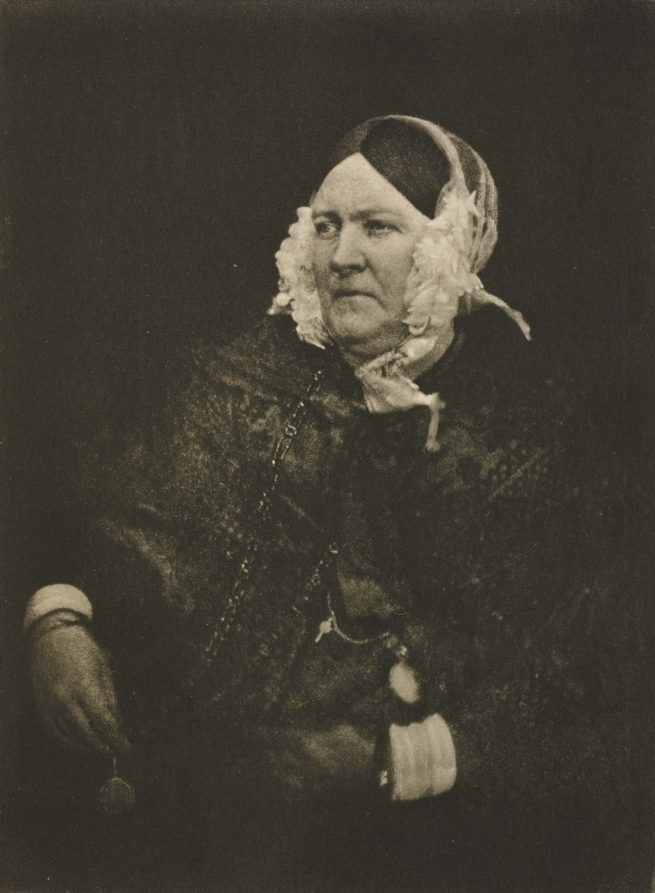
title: Camera Work: Mrs. Rigby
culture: England, 20th century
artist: David Octavius Hill (British, 1802–1870)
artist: and Robert Adamson (British, 1821–1848)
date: 1909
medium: photogravure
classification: Bound Volume